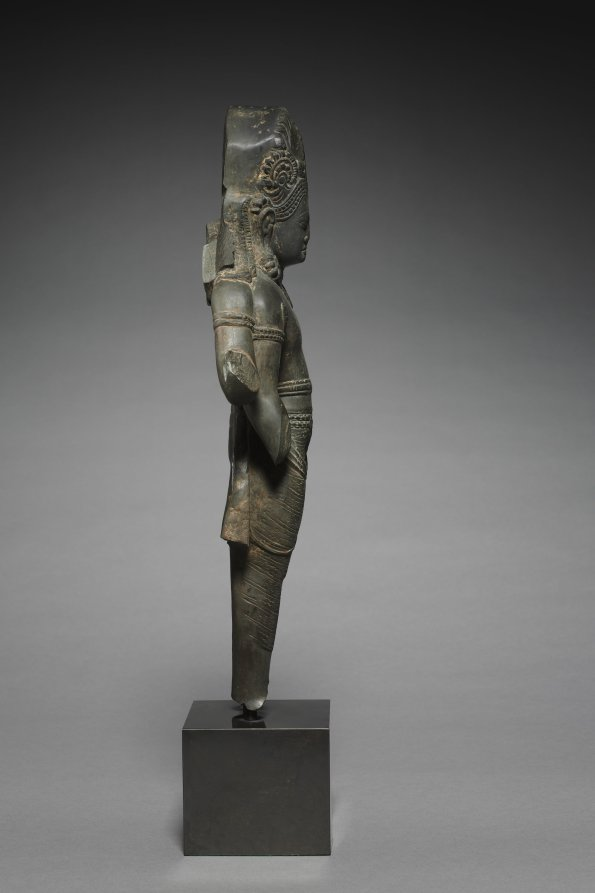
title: Vishnu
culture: Nepal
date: 800s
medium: schist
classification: Sculpture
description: The axial stance and somber expression visually amplify the powerful nature of this four-armed Hindu god. The crown and fine textiles communicate his regal qualities. In his upper left hand, a conch shell signals the start of battle or the sound of OM at the opening of a mantra recited to quell inner demons. Vishnu’s followers glorify his ability to destroy demonic forces that bring imbalance and disorder, both throughout the world and within oneself.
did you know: The dark stone was highly polished and once gleamed like bronze.